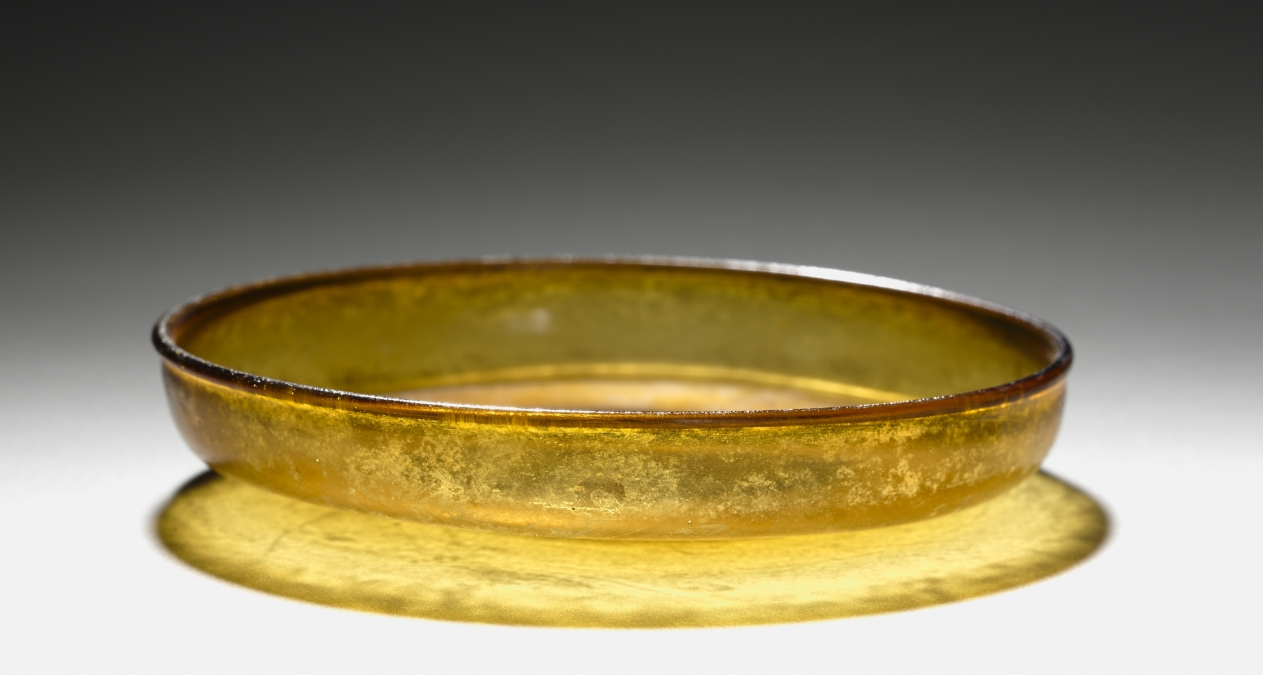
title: Saucer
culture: Eastern Mediterranean, Roman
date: 300s CE or later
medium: glass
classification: Glass